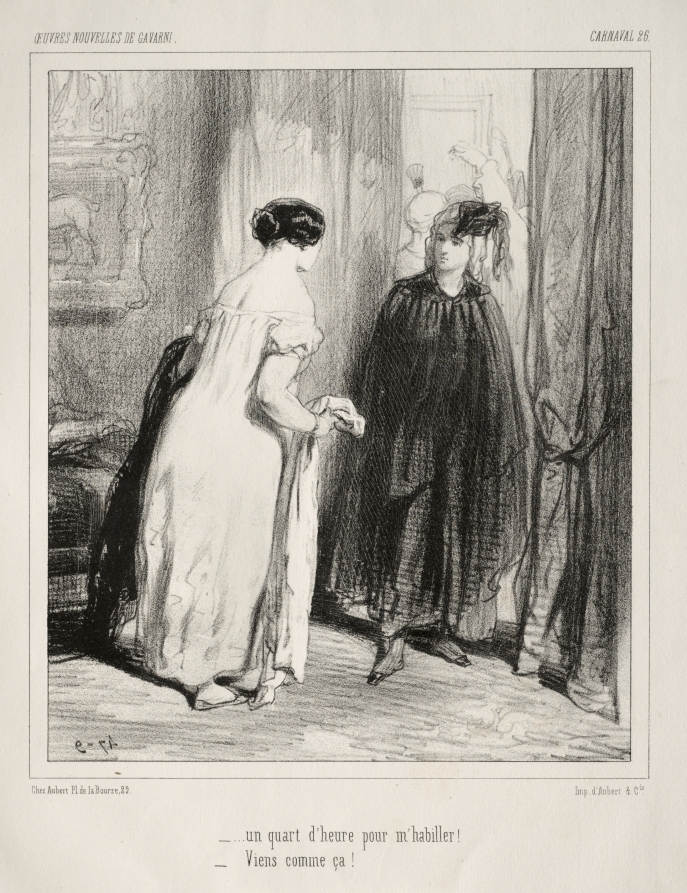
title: Carnaval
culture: France, 19th century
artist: Paul Gavarni (French, 1804–1866)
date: c. 1841–47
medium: lithograph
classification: Print